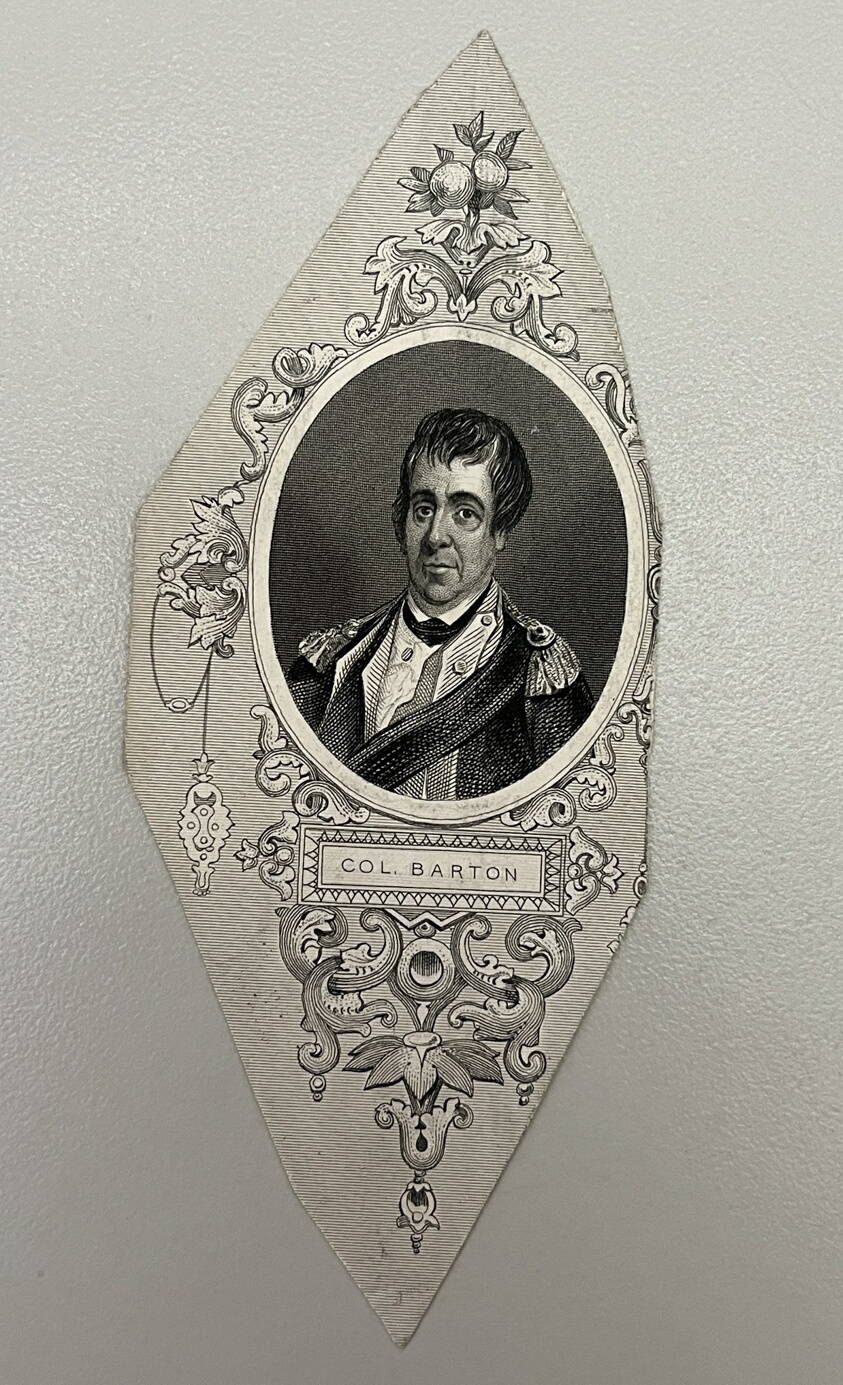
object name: Print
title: Colonel Barton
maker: Artist Unknown (Likely American or British, 19th century)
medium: Stipple engraving on paper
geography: United States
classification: reproduction; print; prints and drawing